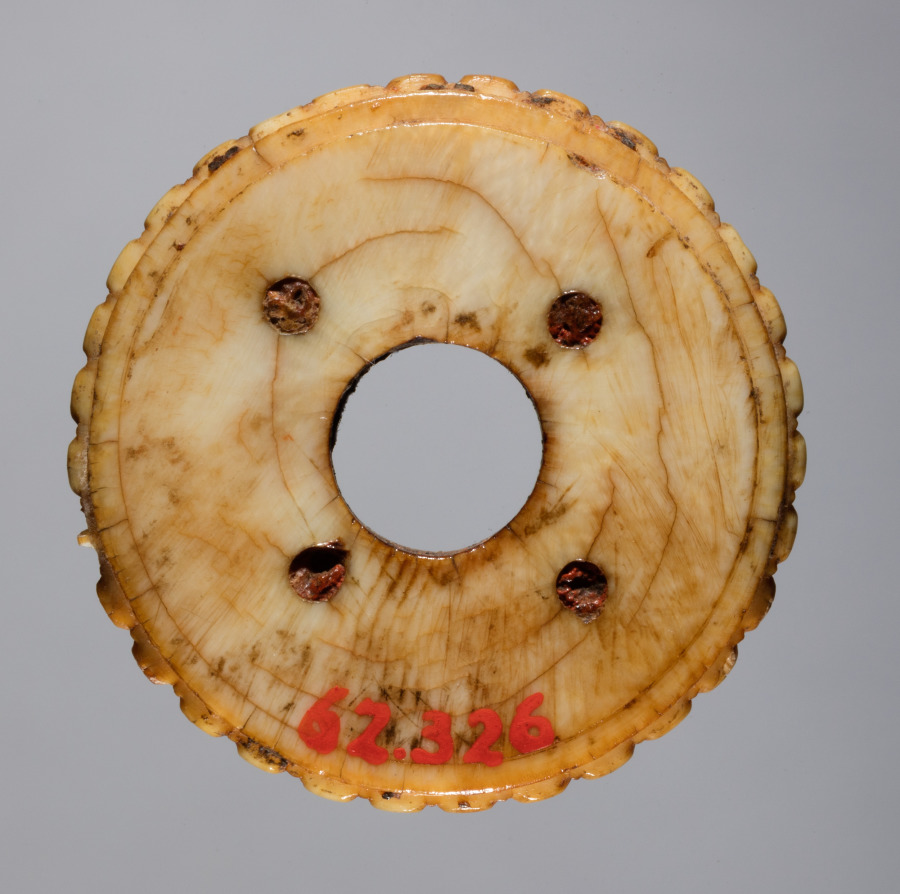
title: Spindle Whorl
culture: Iran, early Islamic period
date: 700s - 900s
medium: bone, incised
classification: Spindle Whorl